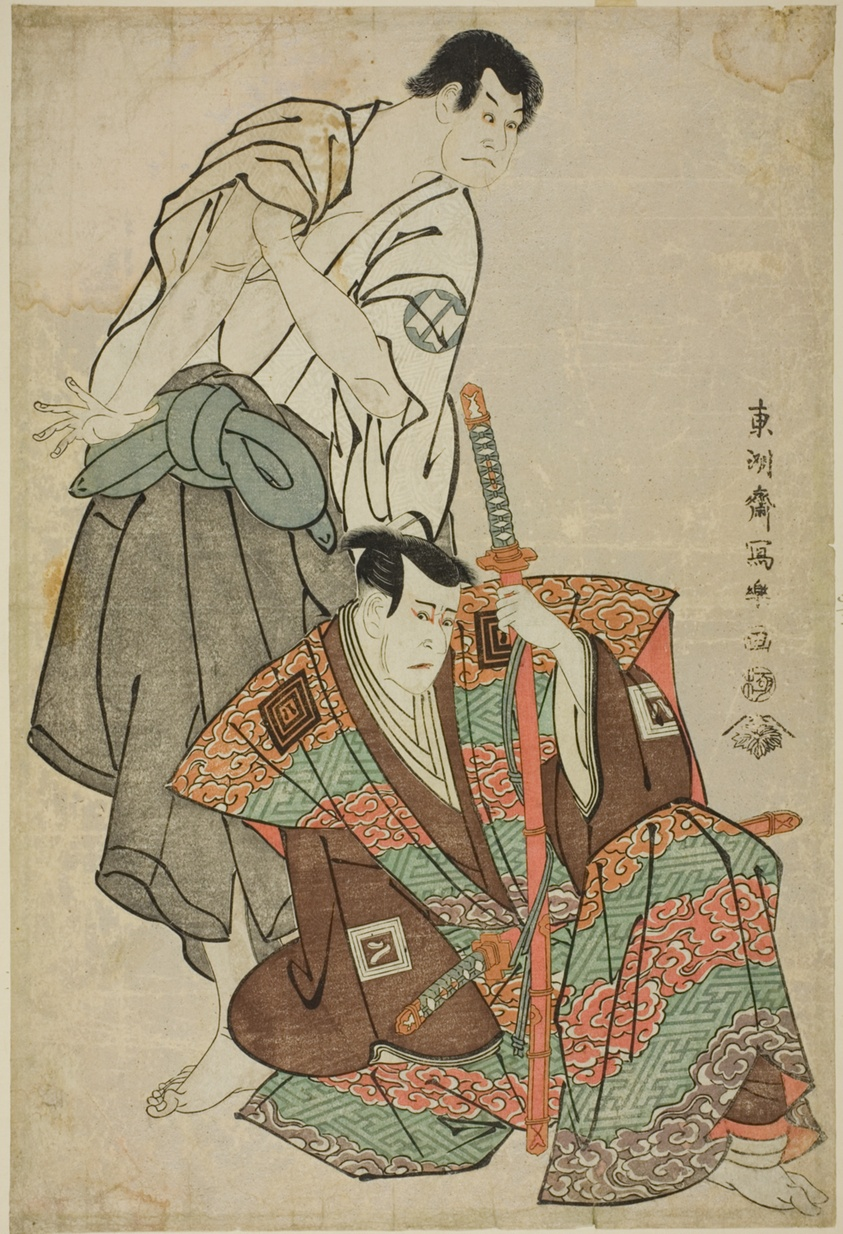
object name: Print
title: The actors Ichikawa Yaozo lll (R) as Fuwa Banzaemon and Sakata Hangoro lll (L) as Kosodate Kannonbo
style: Japanese (culture or style)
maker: Toshusai Sharaku 東洲斎 写楽; Japanese, active 1794-95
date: 1794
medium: Color woodblock print; oban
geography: Japan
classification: woodblock print; print; asian art